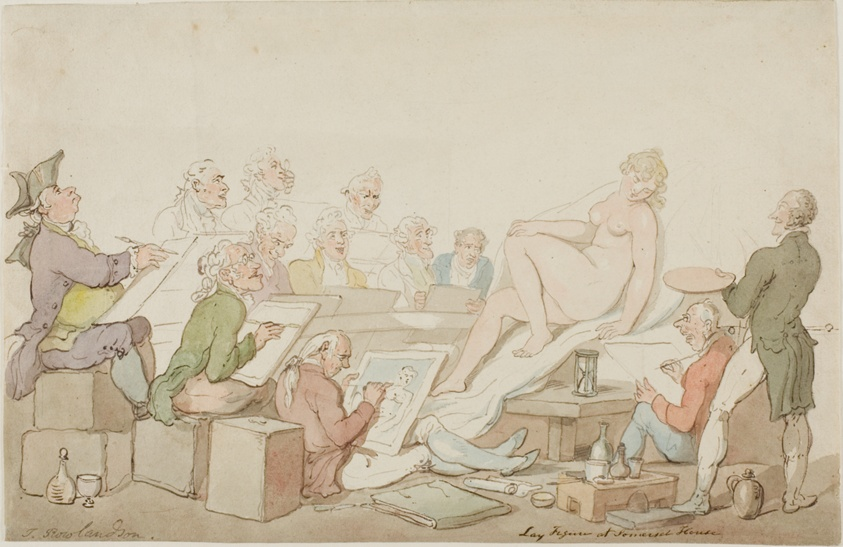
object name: Drawing and Watercolor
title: Lay Figure at Somerset House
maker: Thomas Rowlandson (English, 1756-1827)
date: 1822/27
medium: Pen and brown ink with brush and watercolor over graphite, on ivory wove paper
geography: England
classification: watercolor; drawings (visual works); prints and drawing